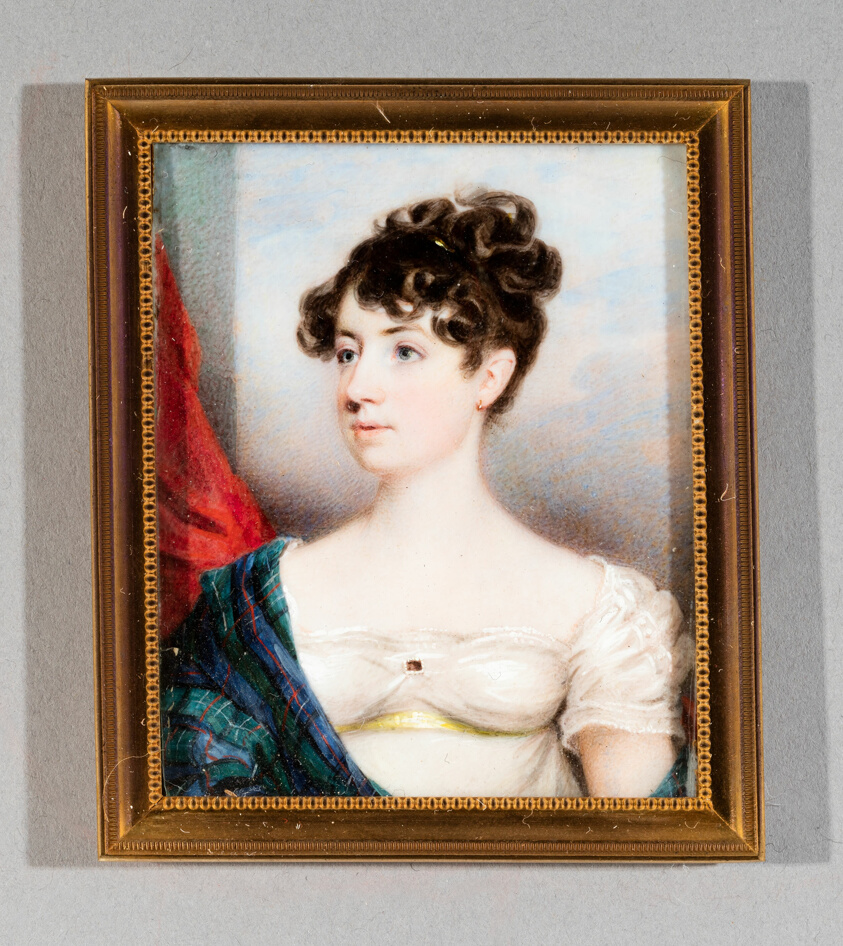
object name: Miniature Painting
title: Portrait of Mary Butler Stark-Christie of Ballinden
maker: William John Thomson (American, 1771–1845)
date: 1812–25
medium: Watercolor on ivory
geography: United States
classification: miniature painting; american arts; miniature; painting